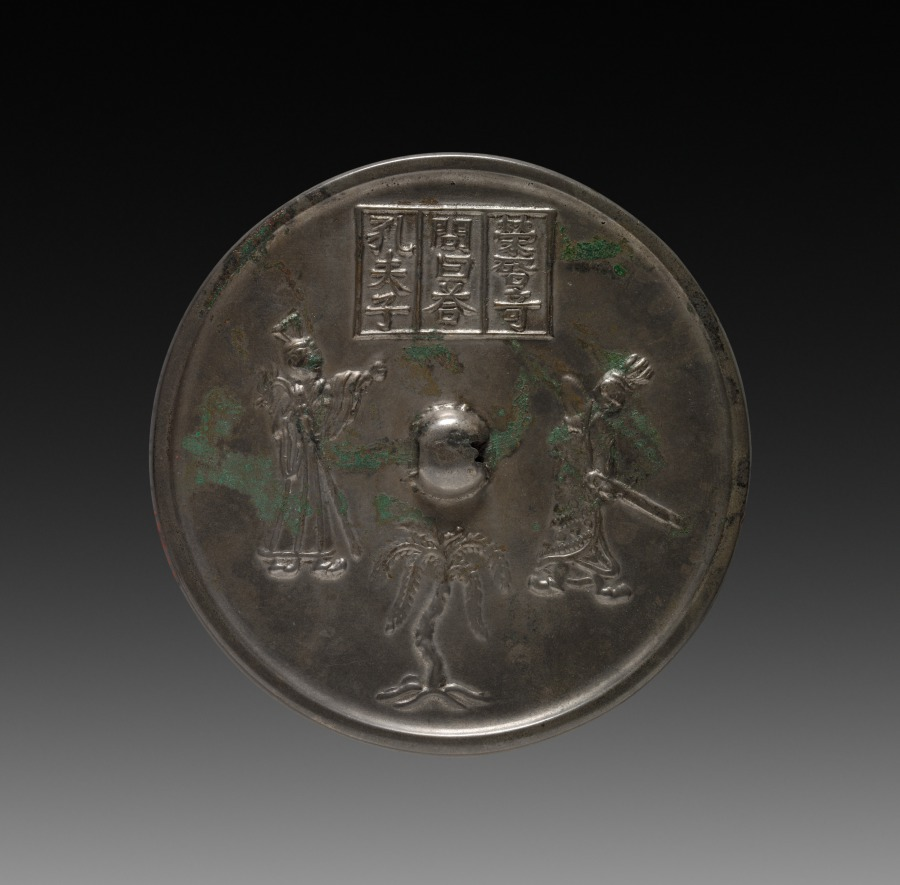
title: Mirror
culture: China, Tang dynasty (618-907)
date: 618–907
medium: bronze with silver inlay in lacquer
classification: Metalwork